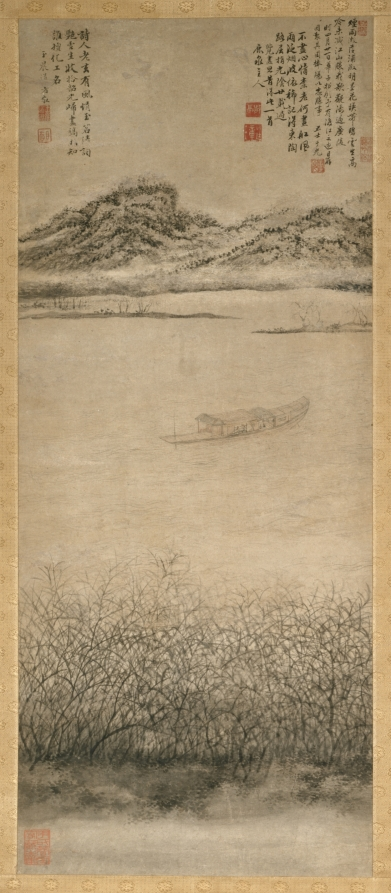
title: The Crossing of the Yangzi River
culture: China, Qing dynasty (1644-1911)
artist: Shang Rui (Chinese, 1634?-)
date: c. 1700–1720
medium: hanging scroll, ink and slight color on paper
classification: Painting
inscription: Colophons: One upper left inscription by the artist followed by two seals; one upper right inscription followed by two seals; three other seals, one in lower left